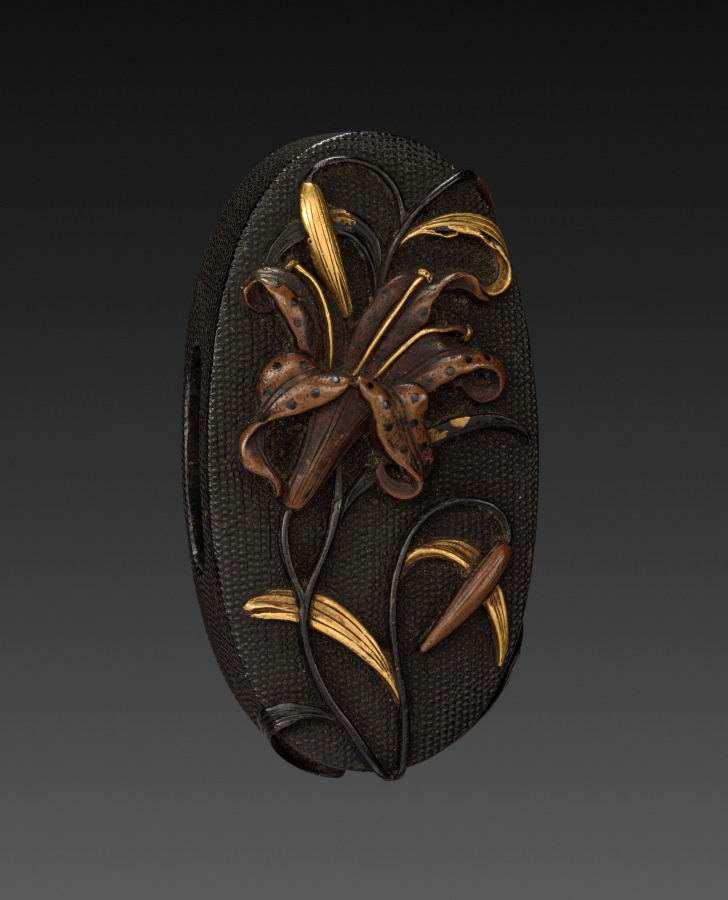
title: Sword-Hilt Pommel (Kashira)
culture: Japan, Edo period (1615–1868)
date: 1700–1850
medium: shakudo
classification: Arms and Armor